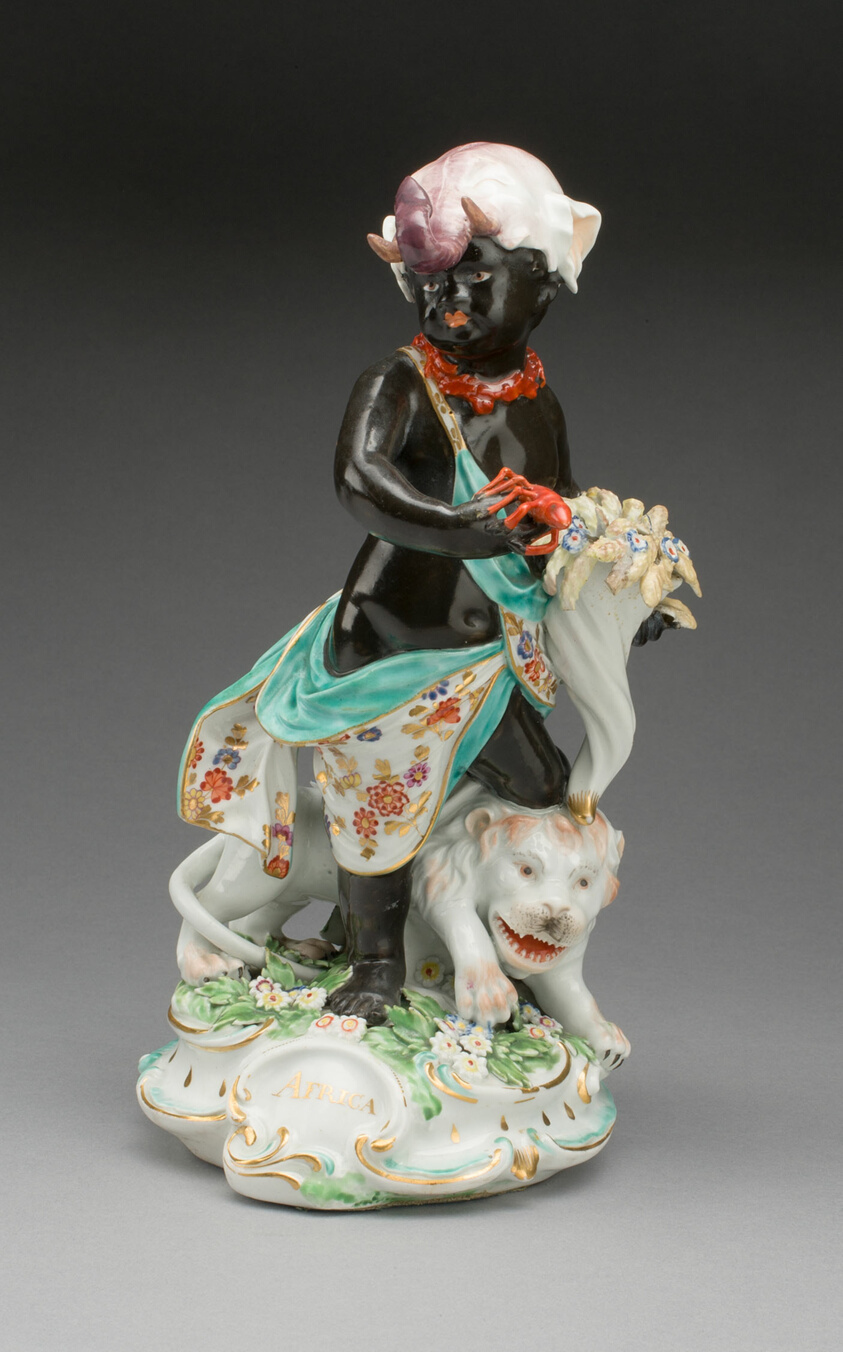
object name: Ceramics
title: Allegorical Figure of Africa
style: Rococo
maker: Derby Porcelain Manufactory (England, 1750-1848)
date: 1770/80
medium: Soft-paste porcelain with polychrome enamels and gilding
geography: Derby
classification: sculpture; ceramics; porcelain; european decorative arts